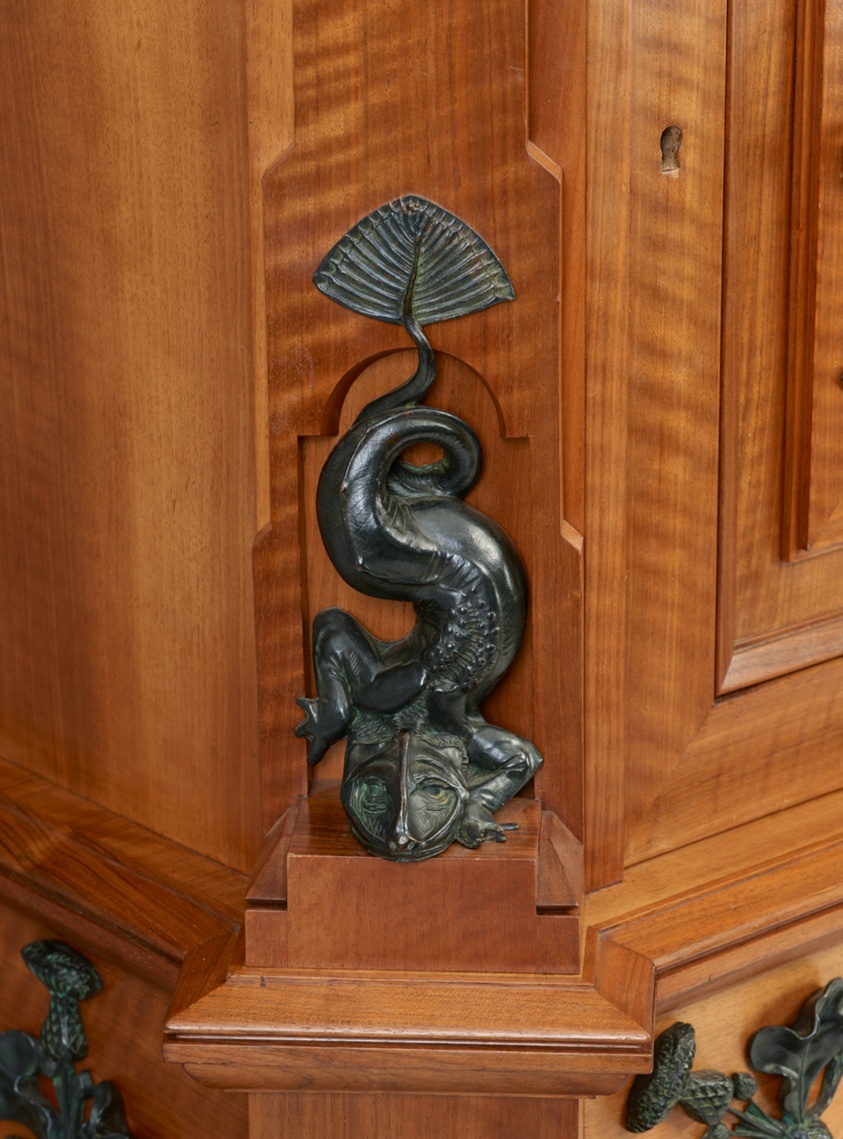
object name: Furniture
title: Cigar Cabinet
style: Neogothique, 19th century, gothic revival, merovingian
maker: Made by Charles-Guillaume Diehl (German, active in Paris, 1811–1885); Designed by Jean-Eugene Brandely (French, active 1867–1873); Bronzes modeled by Emmanuel Fremiet (French, 1824–1910); Paris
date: c. 1867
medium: Oak, cedar and walnut veneers, patinated bronze, and caning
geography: Paris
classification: furniture; humidor; european decorative arts; cabinet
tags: lizards, merovech, merovee, quatrefoil, smoking, cigars, tobacco